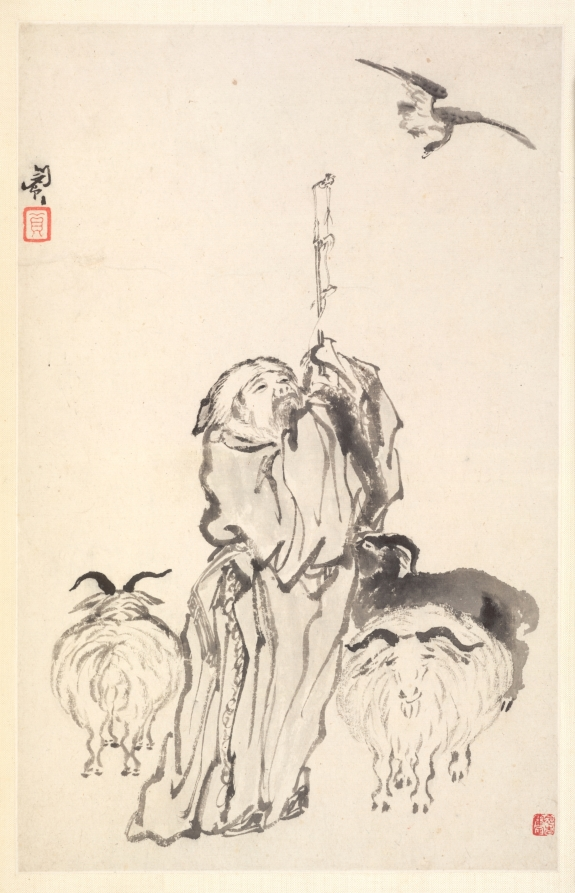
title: Su Wu the Shepherd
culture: China, Qing dynasty (1644-1911)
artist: Min Zhen (Chinese, 1730–after 1788)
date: 1788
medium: album leaf, ink on paper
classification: Painting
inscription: Inscription by Min Chen on the last leaf: I have a habit of collecting strange rocks. My friend Tai-li shan-jen* treasures my paintings as much as I treasure strange rocks. Once we agreed to exchange what we love with each other. However, my busy activities have kept me from carrying this out. This summer I realized that this strange rock has been sitting in my studio for five years, so I painted this to fulfill my old promise. As a record, I chose the grotesque cliff in the last scene of this twelve-leaf album. Cheng-chai, Min Chen inscribed this on the sixth day of the sixth month [July 9] of the wu-shen year [1788]. * Tai-li shan-jen is Wang Li [tzu: Li-fu] tr. Hou-mei Ishida Six seals appearing on the leaves: Min Chen, Cheng-chai, Ching-ch'iao, Chen, Liao-t'ang, Min Chen chih-yin.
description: Min Zhen, who was orphaned at age 12 and developed an eccentric personality, was trained by Tang Yin (1682–1756), a writer, playwright, and superintendent of the imperial porcelain workshops in Jingdezhen. The connection to him may have enabled Min to stay in Beijing for a decade from around 1773. It is not clear whether he ever resided in Yangzhou, but his style is in many instances reminiscent of that of Yangzhou artist Huang Shen. This album demonstrates Min’s versatility and mature style in the last years of his life.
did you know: Su Wu 蘇武 (140-60 BC) endured hardships and became a humble shepherd in an alien land while remaining a loyal servitor of the Han dynasty.